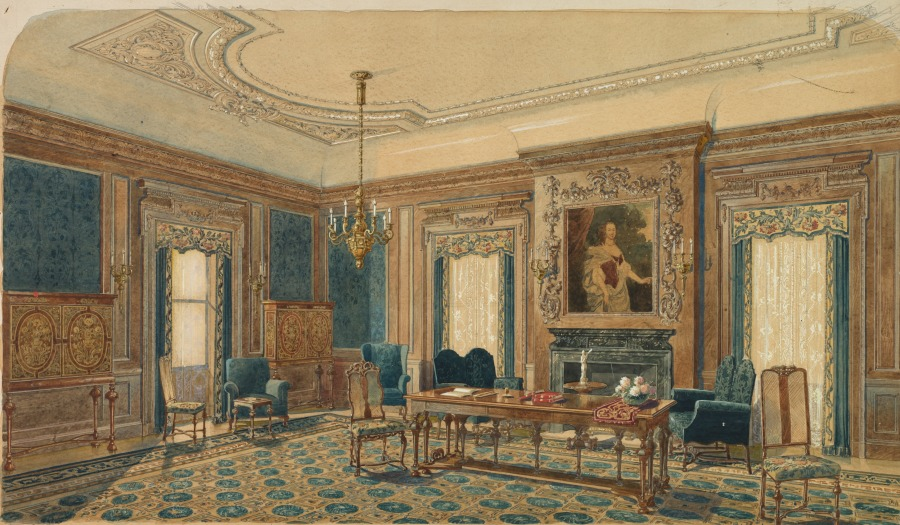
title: Sketch of Interior Design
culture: America, Ohio, Cleveland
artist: August Frederick Biehle, Sr. (American, 1854–1918)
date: before 1918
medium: watercolor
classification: Drawing